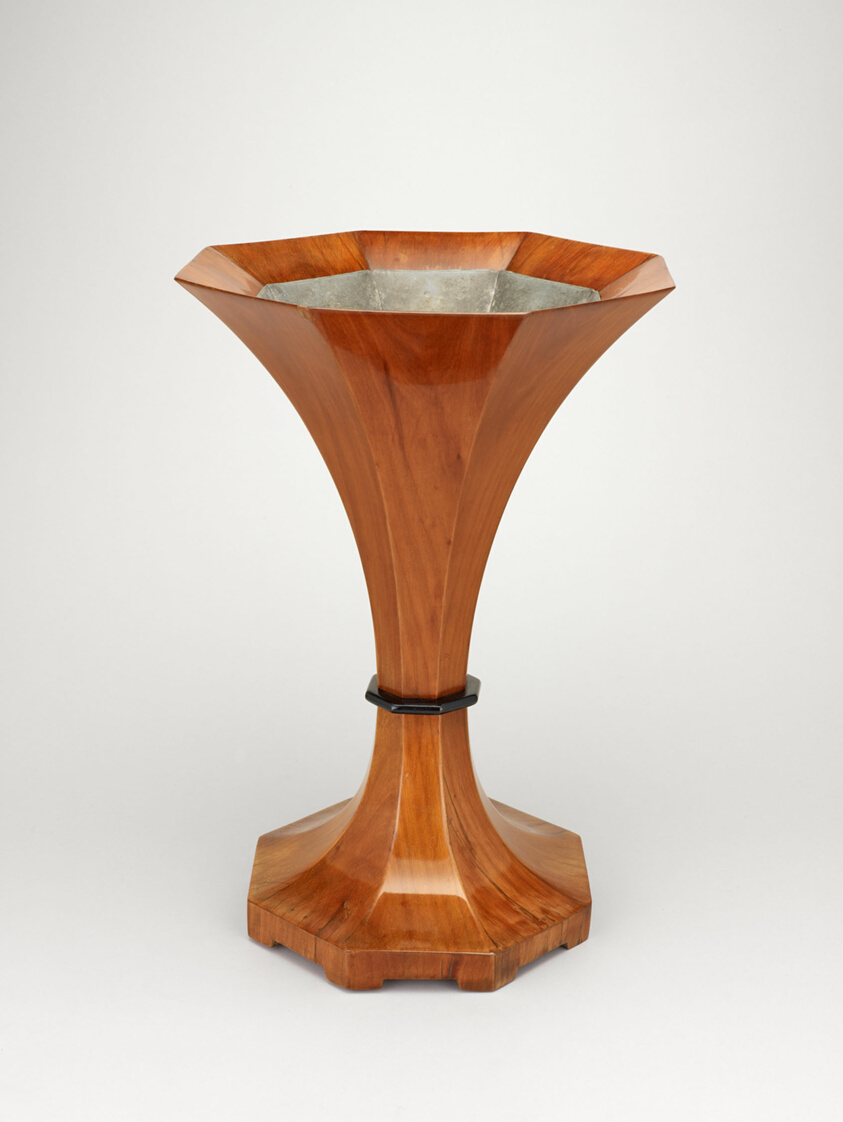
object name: Furniture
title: Spittoon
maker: Austria, Vienna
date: c. 1820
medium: Cherry veneer with zinc insert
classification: furniture